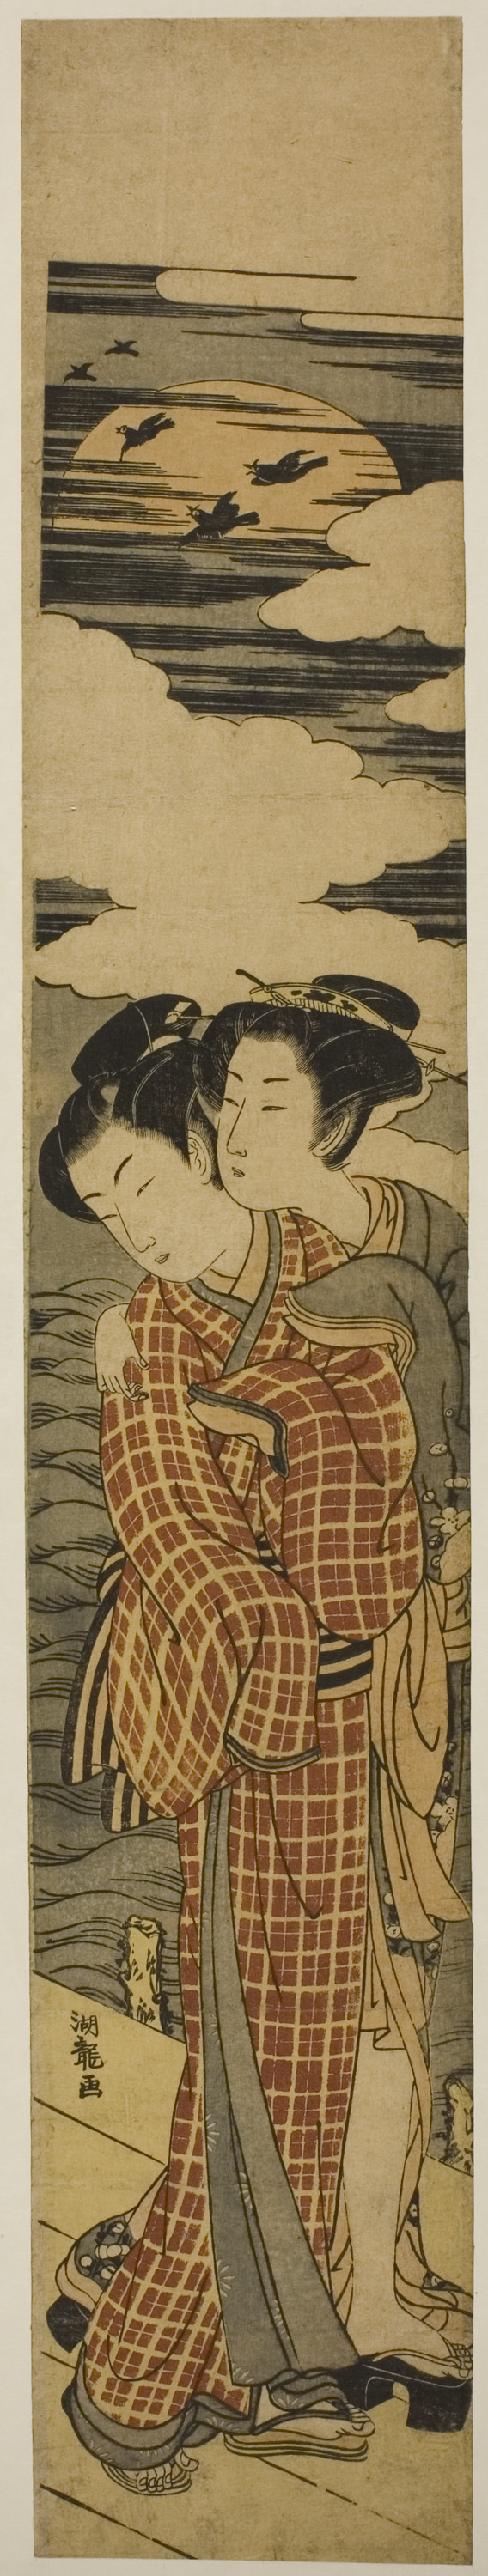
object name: Print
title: Couple Standing on a Pier Embracing on a Moonlit Night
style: Japanese (culture or style)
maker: Isoda Koryusai (Japanese, 1735-1790)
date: c. 1774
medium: Color woodblock print; hashira-e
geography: Japan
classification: woodblock print; print; asian art